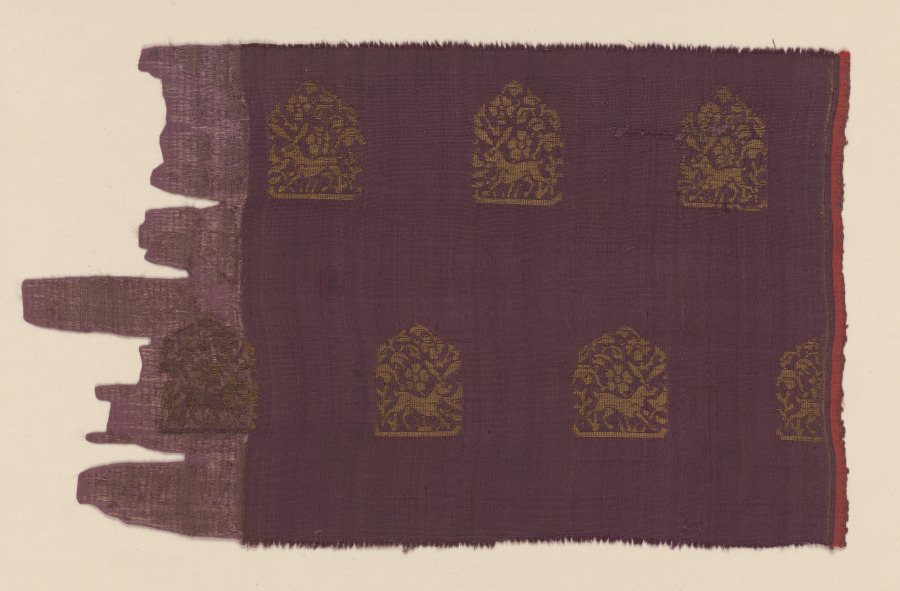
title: Brocade with Hares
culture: Northern China, Yuan dynasty (1271-1368)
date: 1200s–mid-1300s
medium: Silk: tabby, brocaded; gold thread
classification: Textile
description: The motif of the hare among bushes may relate to the hunting activities of the Khitan, the Jurchen, and the Mongols. Hare hunts are recorded in the Liaoshi (History of the Liao Dynasty) and were often reported by envoys returning to China from the northern states. The asymmetry of the image in this textile is characteristic of Jin brocades. However, the paired (instead of single) warps reveal the influence of craftsmen from the eastern Iranian world and therefore dates the textile to the Mongol period.